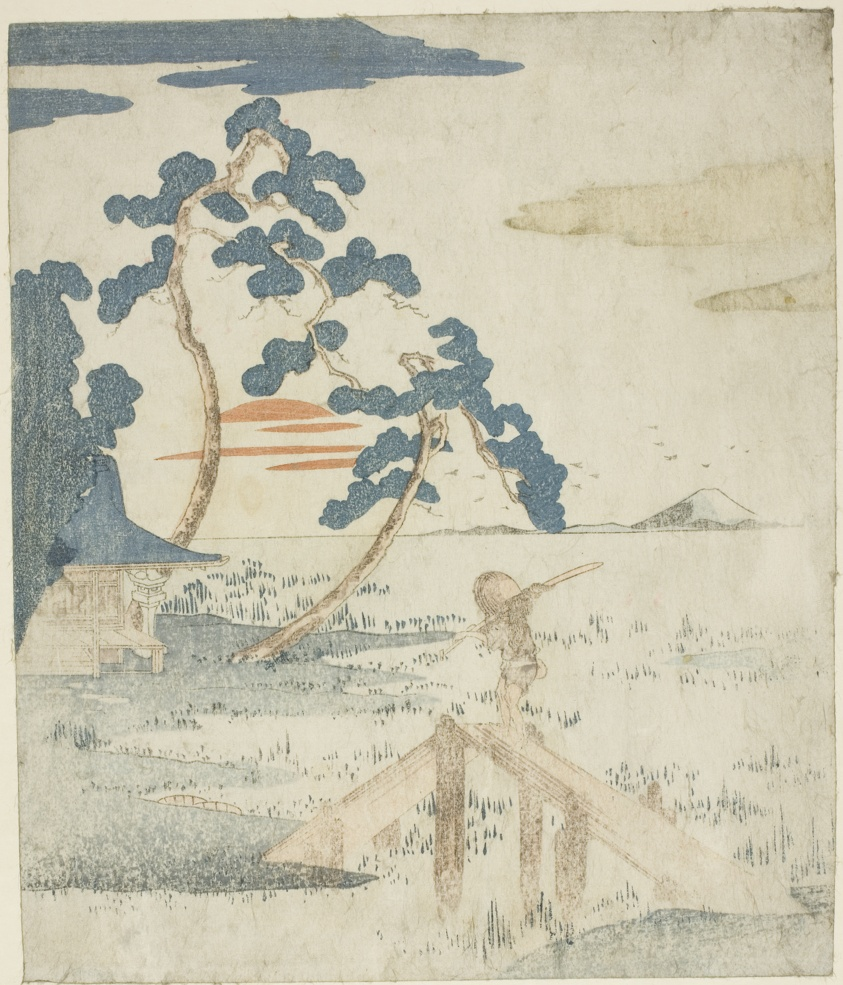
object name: Print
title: Man Crossing a Bridge as the Sun Rises, from an untitled edition (without poetry) of the illustrations for the series "Five Prints of Mount Fuji (Fuji goban no uchi)"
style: Japanese (culture or style)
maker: Attributed to Utagawa Kuniyoshi; Japanese, 1797-1861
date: c. 1830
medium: Color woodblock print; shikishiban, surimono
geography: Japan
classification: woodblock print; print; asian art